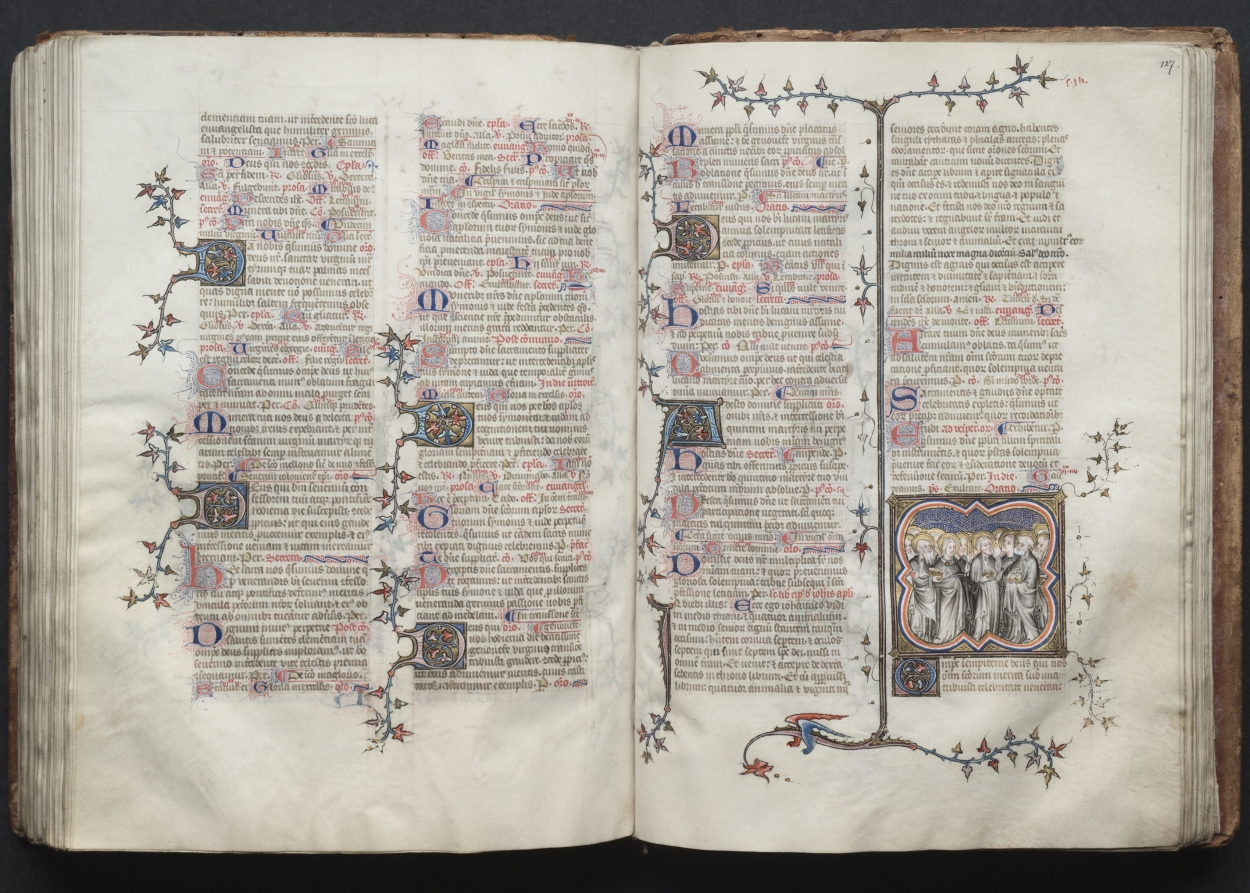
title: The Gotha Missal: Fol. 126v, Text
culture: France, Paris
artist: Master of the Boqueteaux (French)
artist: and Workshop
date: c. 1375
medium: ink, tempera, and gold on vellum; blind-tooled leather binding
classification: Bound Volume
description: The style and quality of this manuscript's decoration is typical of deluxe Parisian books made for aristocratic or royal patrons. Most of the book's decoration appears to be the work of the Master of the Boqueteaux, an artist active at the court of King Charles V (died 1380). His style was apparently shared by a number of book illuminators working in and around Paris. It is very possible that the Gotha Missal belonged to Charles V, but is not provable because the manuscript has no royal portraits and lacks a colophon. Given the book's magnificent decoration, however, it would seem that it was produced for a Valois prince, if not for the king himself. The manuscript receives its name from the German dukes of Gotha, its later owners.